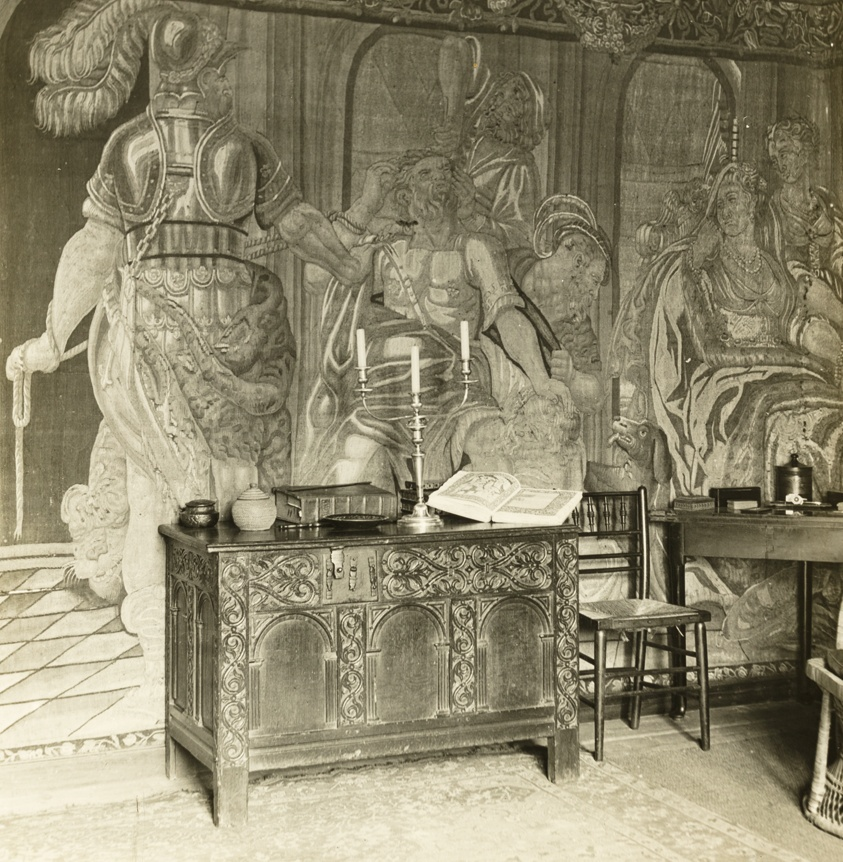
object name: Photograph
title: Kelmscott Manor: Tapestry Details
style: Pictorialism, 19th century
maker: Frederick H. Evans (English, 1853–1943)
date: 1896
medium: Lantern slide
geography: England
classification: photograph; photography